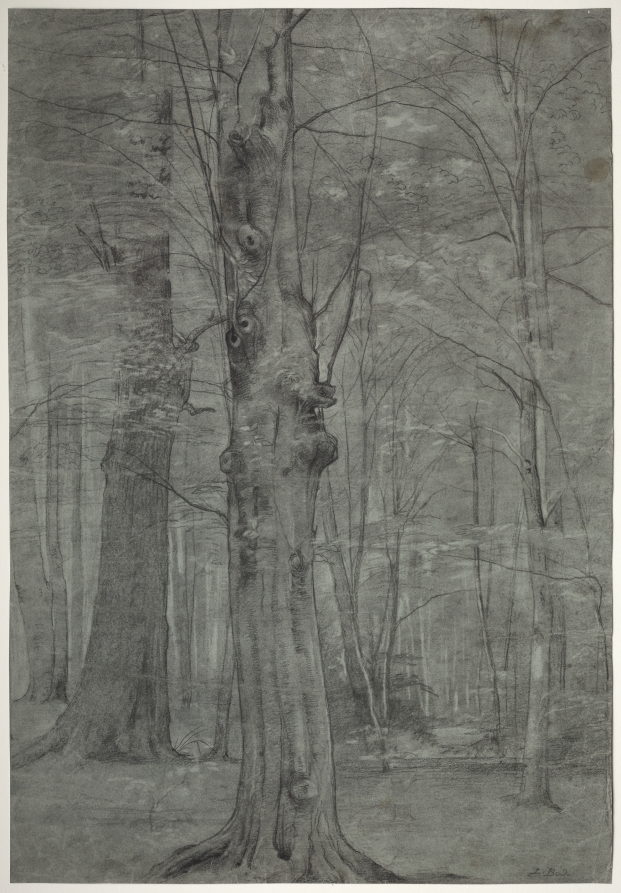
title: Trees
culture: Germany, last half 19th or first decade 20th century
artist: Leopold Bode (German, 1831–1906)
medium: black chalk, with stumping and erasing; framing lines in graphite (except at bottom)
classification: Drawing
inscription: signed, lower right, in black chalk: L. Bode ; VERSO, lower left, in graphite: No. 2446 L. Bode +MISZ